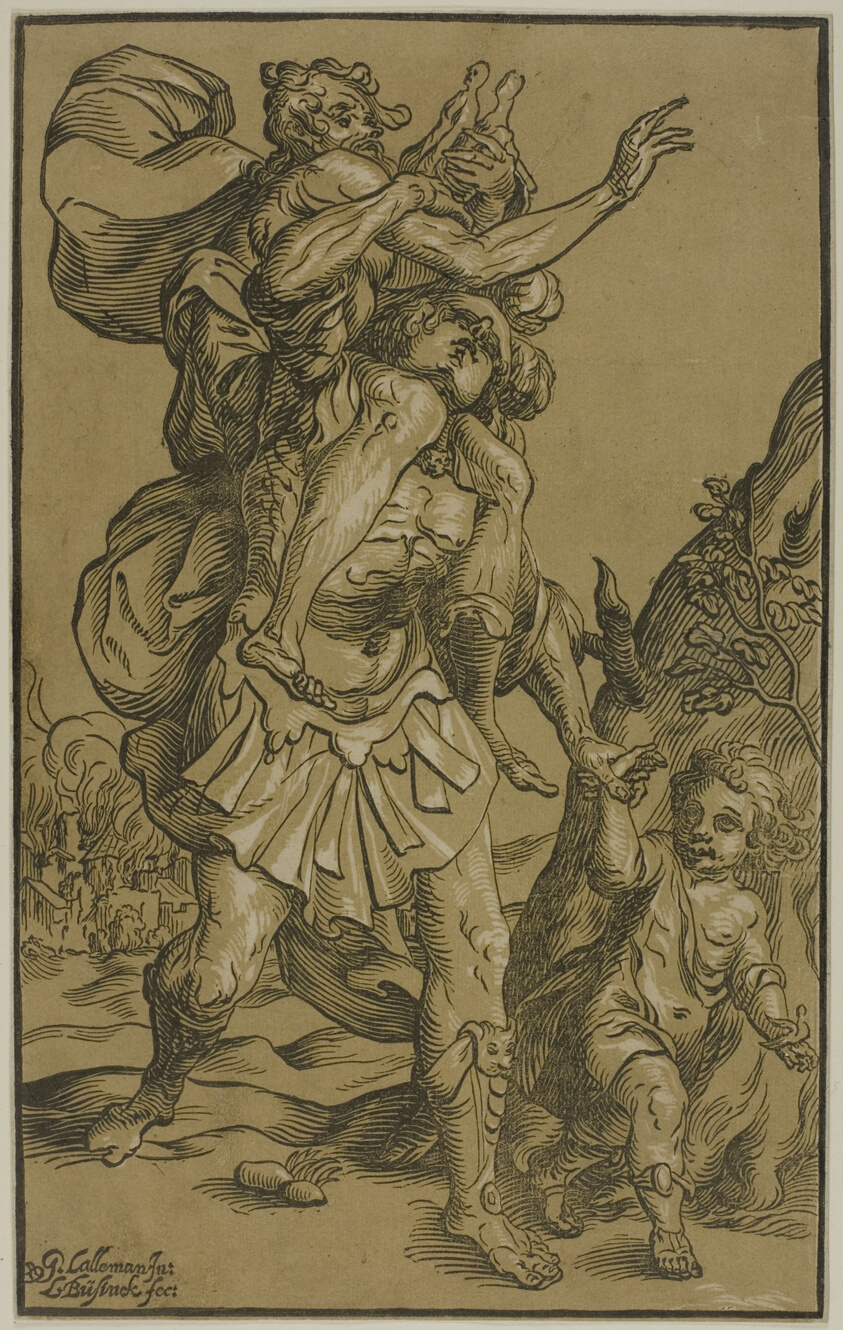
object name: Print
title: Aeneas and Anchises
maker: Attributed to Ludolph Büsinck (German, 1585-1648); or Jean Baptiste Lallemand (French, 1710-1803)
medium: Chiaroscuro woodcut on paper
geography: Germany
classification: woodcut; print; prints and drawing